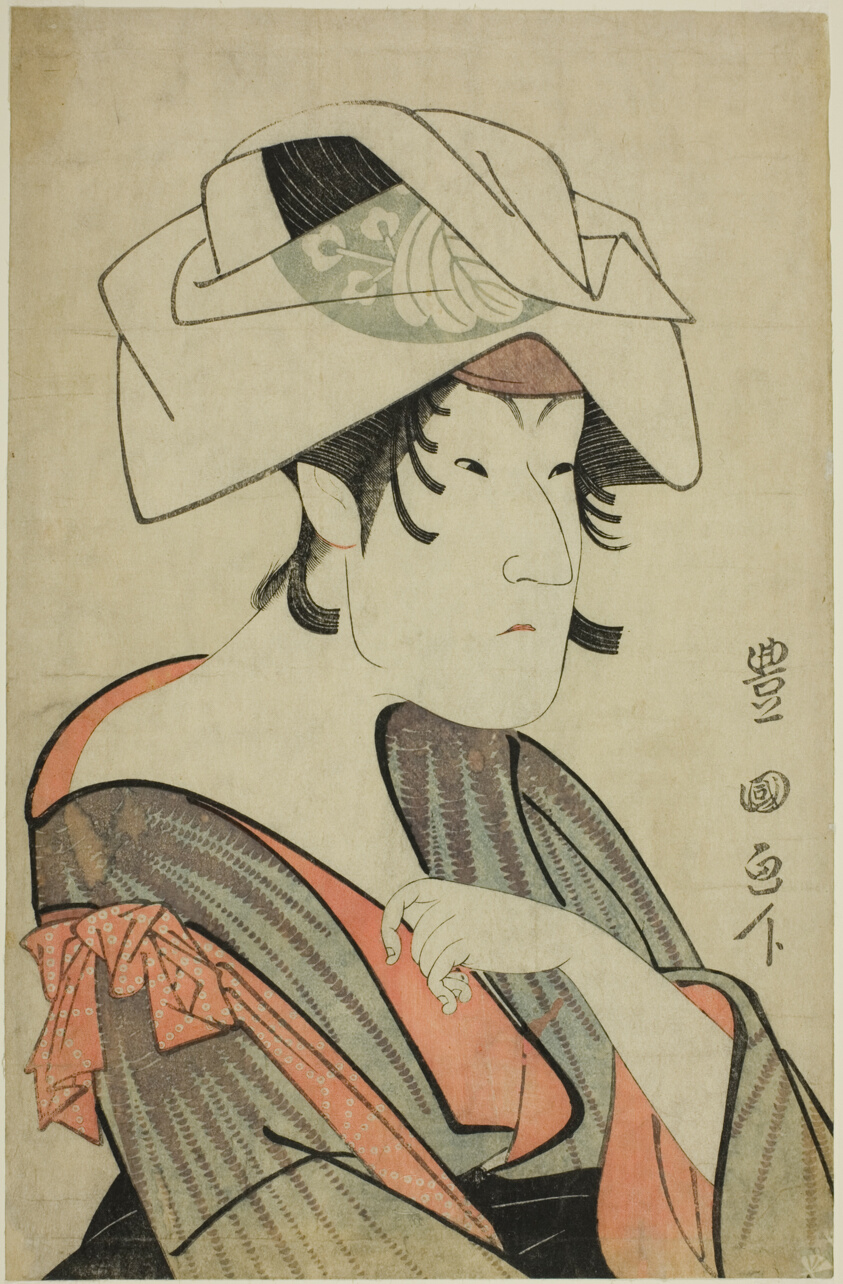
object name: Print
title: Nakayama Tomisaburo. Dressed as a Woman Wearing a Towel on Her Head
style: Japanese (culture or style)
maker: Utagawa Toyokuni I 初代 歌川 豊国; Japanese, 1769–1825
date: c. 1795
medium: Color woodblock print; oban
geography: Japan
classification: woodblock print; print; asian art